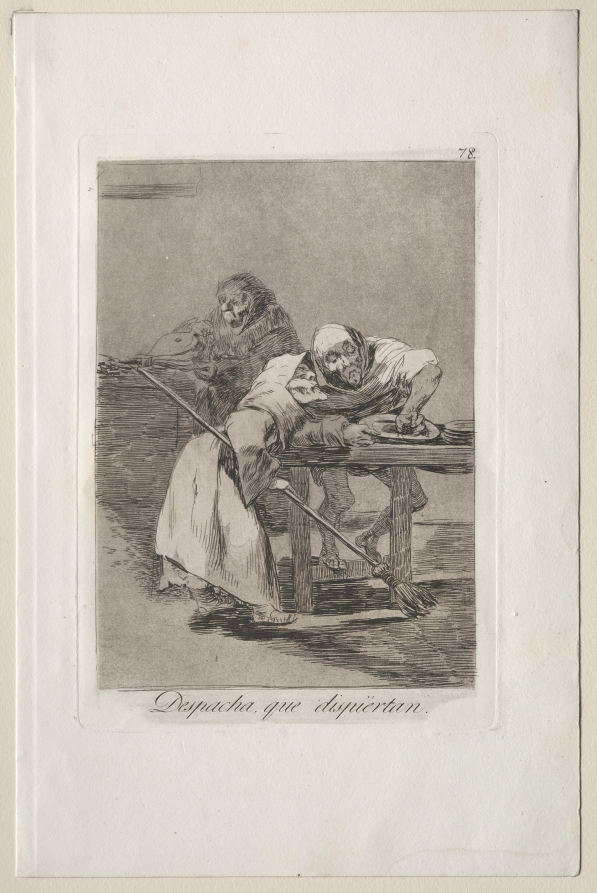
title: Be Quick, They are Waking Up, Plate 78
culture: Spain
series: Los Caprichos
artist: Francisco de Goya (Spanish, 1746–1828)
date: 1799 (printed c. 1855)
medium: etching and aquatint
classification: Print